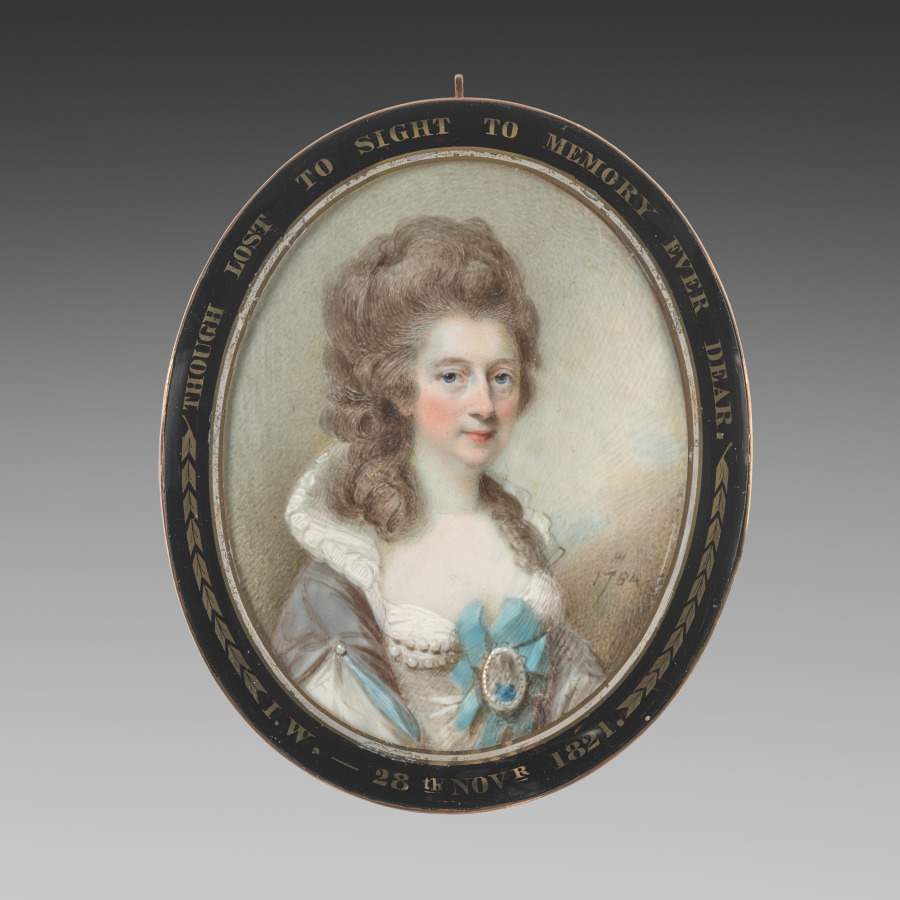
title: Portrait of Lady Grace Anna Newenham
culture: England, 18th century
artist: Horace Hone (British, 1756–1825)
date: 1784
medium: watercolor on ivory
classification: Portrait Miniature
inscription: Signed right: HH / 1784 [HH in monogram; inscribed on frame: "THOUGH LOST TO SIGHT TO MEMORY EVER DEAR. I.W. 28th NOVr 1821."]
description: Lady Grace Anna Newenham (née Burton, 1725–1807) was the wife of Sir Edward Newenham (1734–1814), a prominent radical Protestant Irish politician and MP for Dublin, whom she married in 1754 at St. Thomas in Dublin. Lady Newenham herself came from a highly influential family with deep Whig political roots in Dublin. This miniature was painted in 1784, when she was nearly 60 years old and had been married for 30 years. This period found her husband, Edward, deeply in debt, going to great lengths to secure employment for his children, and planning a trip to America. While the former conditions would not encourage an artistic expenditure, the latter might have provided the impetus for this portrait to be commissioned. Lady Newenham wears a gray wrap with a high white collar and a white low-neck dress. Her costume is summarily painted with quick strokes, and the ivory ground is allowed to show through particularly at her breast, enhancing the delicacy of her complexion. She is not, however, overly flattered as she would have been in the hands of a miniature painter like Richard Cosway (1742–1821). Instead, Horace Hone gently described her sagging jaw line as well as the wrinkles and moles on her face. She has the eyes of an older woman, beneath which Hone’s trademark glowing pink cheeks seem almost to suggest cosmetics. The texture of her lightly powdered brown hair that falls to her shoulders is delineated by Hone’s technique of scraping the surface of the watercolor paint with extremely fine lines that reflect light and suggest individual strands of hair. The background is a muddy gray sky with a hint of pale blue. Among the 18 children that Lady Newenham gave birth to over the course of two decades, six died at a young age. Lady Newenham wears a miniature on her breast, possibly depicting one of the children she lost. The back of the miniature contains plaited hair under glass, bordered with an elaborate woven hair “belt,” a typically Irish form of hairwork.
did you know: Human hair was frequently incorporated into miniatures and was especially appropriate for mourning miniatures because it transformed the object into a kind of reliquary.